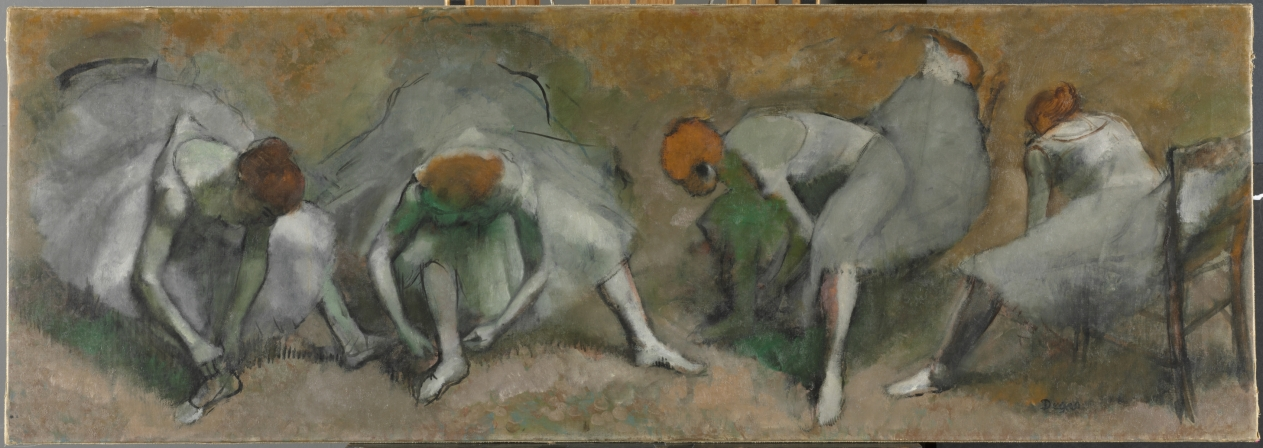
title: Frieze of Dancers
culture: France, 19th century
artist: Edgar Degas (French, 1834–1917)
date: c. 1895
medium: oil on fabric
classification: Painting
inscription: Signed in lower right: Degas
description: This painting may depict a single dancer seen from four different viewpoints. The young woman is placed in an undefined setting, surrounded by mere wisps of color, applied so spontaneously that the paint ran and dripped. Degas even added the circles in the foreground with his thumb. Such audacity, while acceptable in a small sketch, must have shocked the artist's contemporaries when presented on a six-foot canvas. Equally radical is the idea of combining multiple views of a single figure. Degas's unusual presentation may have been inspired by the photographs of Eadweard Muybridge (1830-1904)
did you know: The ballet is a subject Degas returned to again and again over the course of his career. Rather than public performances, he often depicted dancers behind the curtain, practicing, waiting, or, as in this painting, lacing up their shoes.